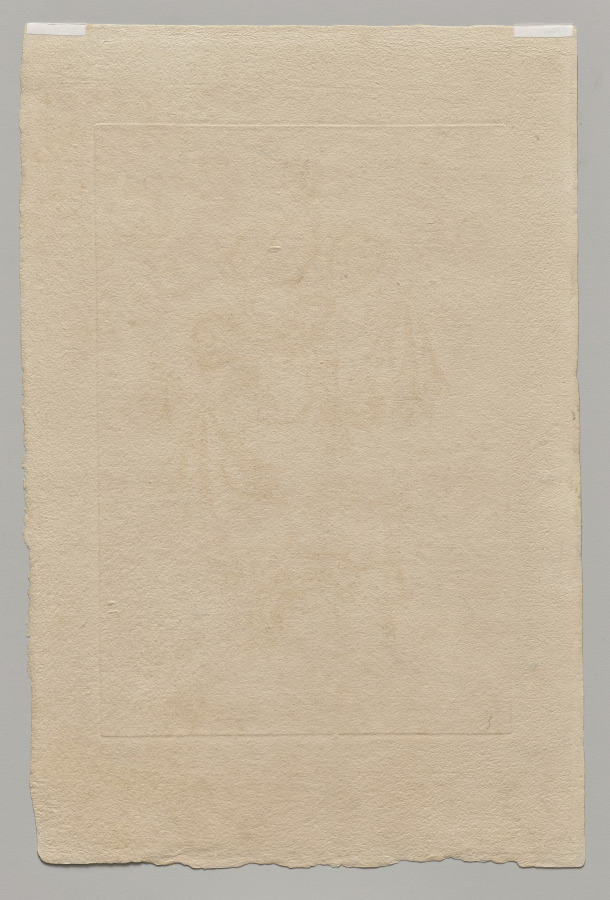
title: Persian Flowers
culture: France, 18th century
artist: Jean Baptiste Pillement (French, 1728–1808)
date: 1755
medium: etching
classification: Print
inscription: Watermark, undeciphered letters/word(s) along left edge.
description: Jean Baptiste Pillement was one of the most influential designers of the Rococo period, known for his varied and prolific chinoiseries (European variants of Chinese and Japanese motifs). His designs were spread throughout Europe primarily via their translation into prints. This print is one of a set of six etched by Pillement himself. Each depicts a so-called “Persian” flower, largely fantasies, presenting strange, alienlike floral forms that could be adapted to various uses from textiles to wall decorations.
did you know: The artist Jean Baptiste Pillement was employed by Marie Antoinette to create decorations for her legendary retreat, the Petit Trianon, at Versailles.